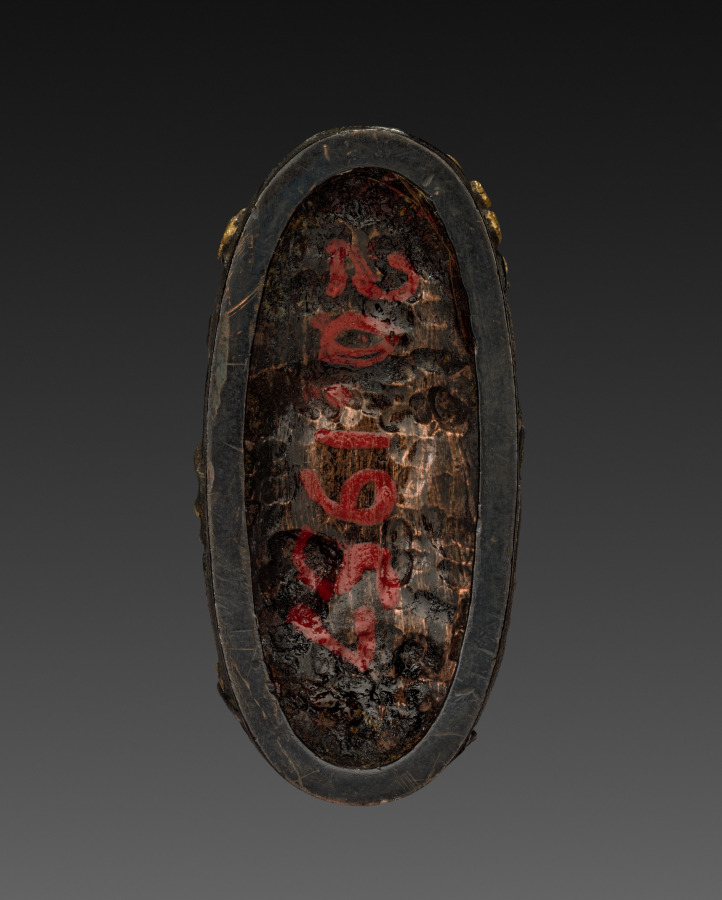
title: Sword-Hilt Pommel (Kashira)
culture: Japan, Edo period (1615–1868)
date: 1700–1850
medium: shakudo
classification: Arms and Armor